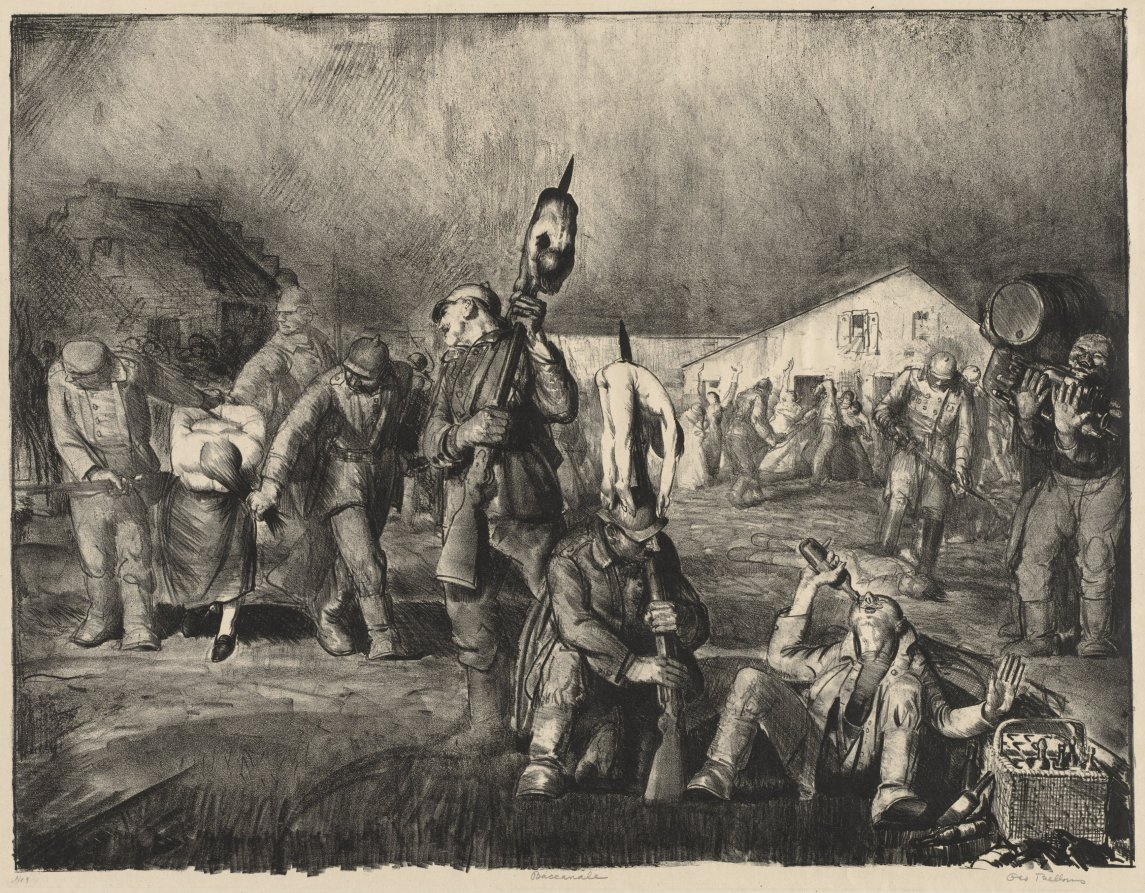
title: War Series: The Bacchanale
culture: America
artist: George Bellows (American, 1882–1925)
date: 1918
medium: lithograph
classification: Print